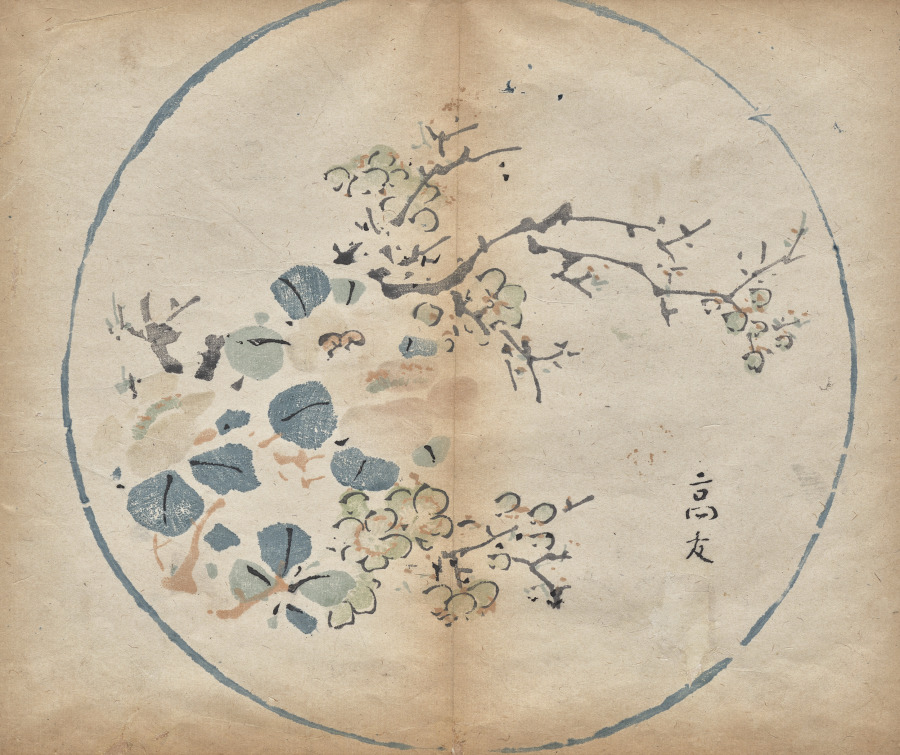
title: Blossoms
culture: China, Ming dynasty (1368–1644)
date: 1625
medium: color woodblock print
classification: Print